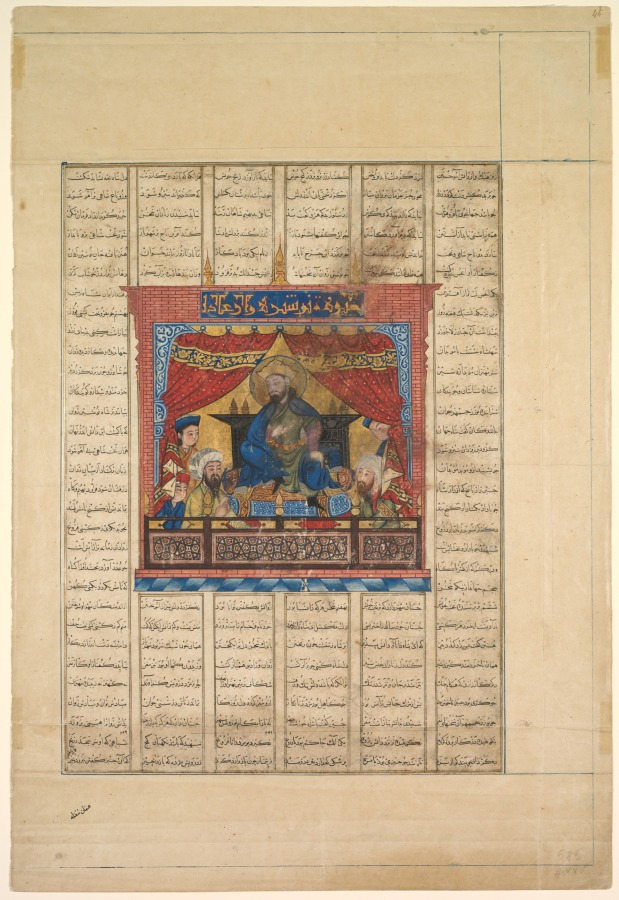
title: Portrait of Nushirwan the Just (verso) from a Shahnama (Book of Kings) of Firdausi (940–1019 or 1025)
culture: Iran, Tabriz, Ilkhanid period (1256-1353)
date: 1330–35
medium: opaque watercolor, ink, and gold on paper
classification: Manuscript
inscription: Script: Naskh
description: Mongol interest in the production of illustrated manuscripts eventually focused on Persian epic poetry. The Shahnama, a compilation of the epics and tales of Iran's legendary heroes, was a natural choice; the book included many subjects that suited Mongol taste, such as banquets, battles, hunting, and magical or fantastic events. Seated on the throne in the center of the painting is the Sasanian ruler of Iran, Khusraw I Anushirwan (531–579), descendant of Bahram Gur. Above the king's head an inscription reads, "Picture of Nushirwan the Just." The figure in the elaborate turban to the left of the king is probably the young Minister Buzurgmihr, famous for his wisdom and virtue. To celebrate the explanation of a troublesome dream by Buzurgmihr, Nushirwan held a series of seven banquets. The text around this painting describes the fifth banquet.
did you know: The symmetrical composition conveys the stability, balance, and restraint during the reign of King Nushirwan the Just.